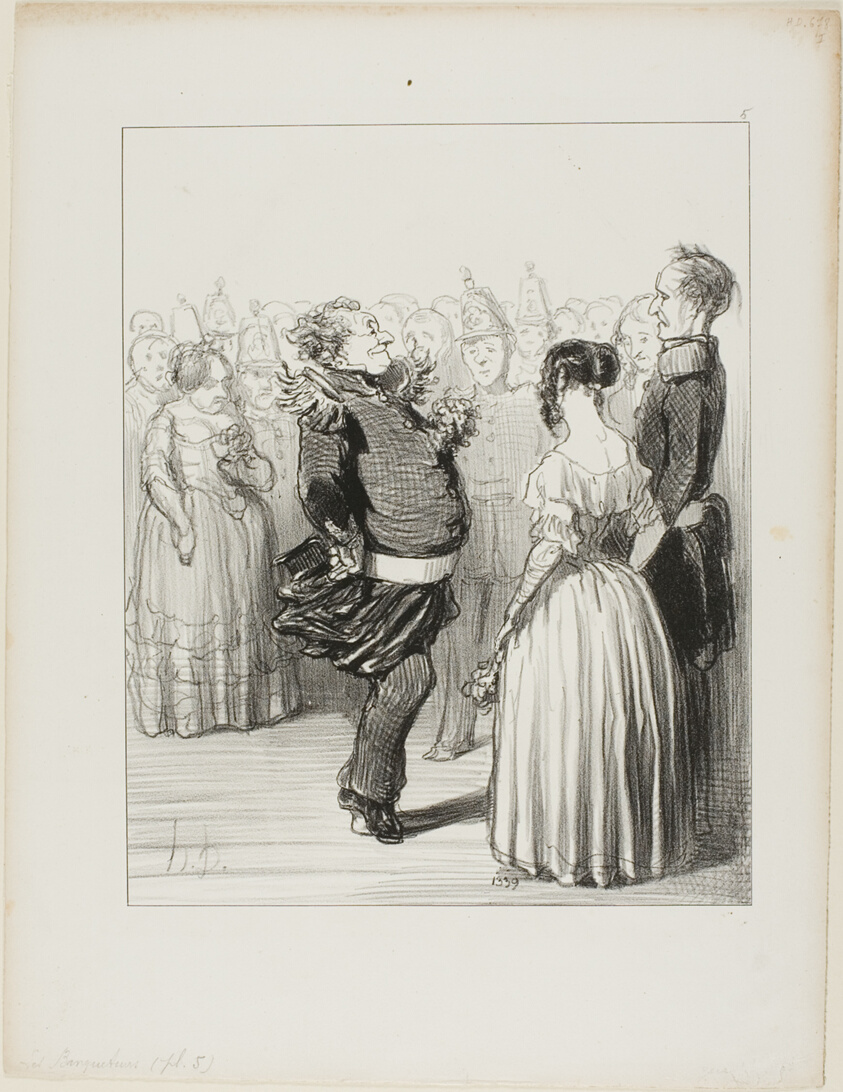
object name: Print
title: Rifolard opens the ball and executes a bold dancing step forward, which receives widespread praise, plate 5 from Les Banqueteurs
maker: Honoré Victorin Daumier; French, 1808-1879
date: 1848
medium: Lithograph in black on white wove paper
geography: France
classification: lithograph; print; prints and drawing